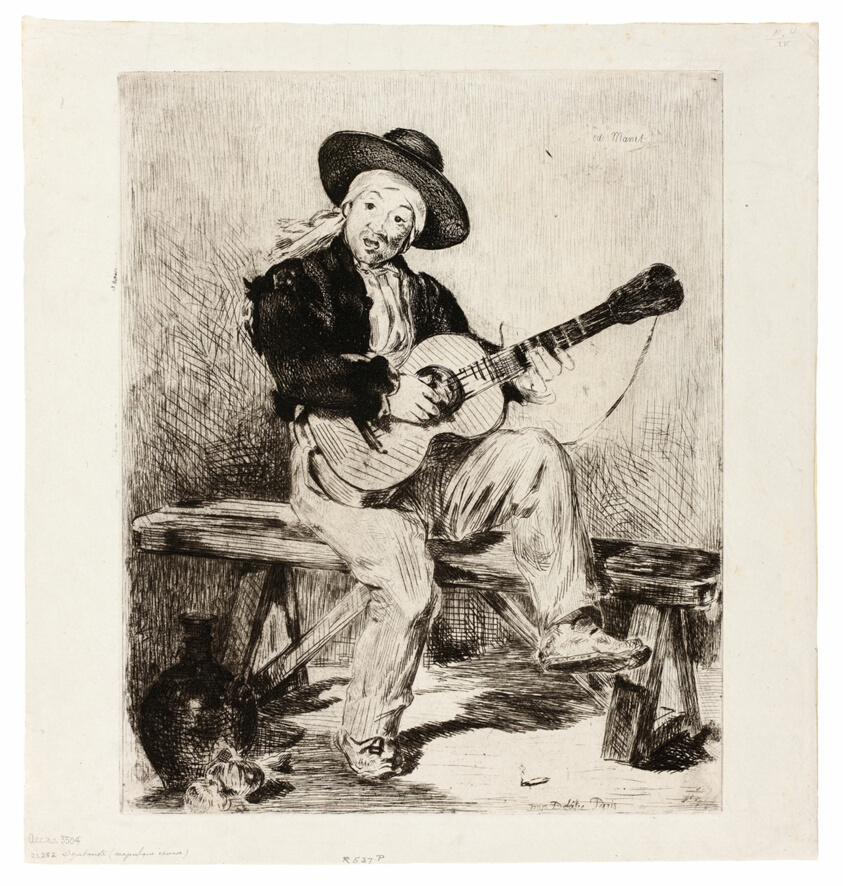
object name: Print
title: The Spanish Singer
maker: Édouard Manet (French, 1832-1883); printed by Auguste Delâtre (French, 1822-1907)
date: 1861–62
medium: Etching, lavis and roulette in black on ivory China paper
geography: France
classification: etching; print; prints and drawing